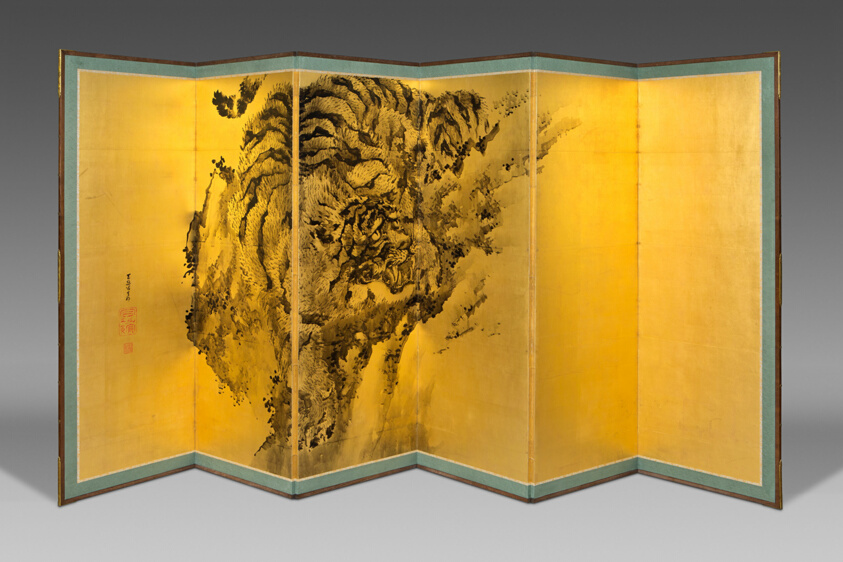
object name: Painting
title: Dragon and Tiger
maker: Kishi Ganku (Japanese, 1749-1838)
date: dated 1835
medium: Pair of six panel screens; ink and gold on paper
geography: Japan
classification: screen; asian art; painting